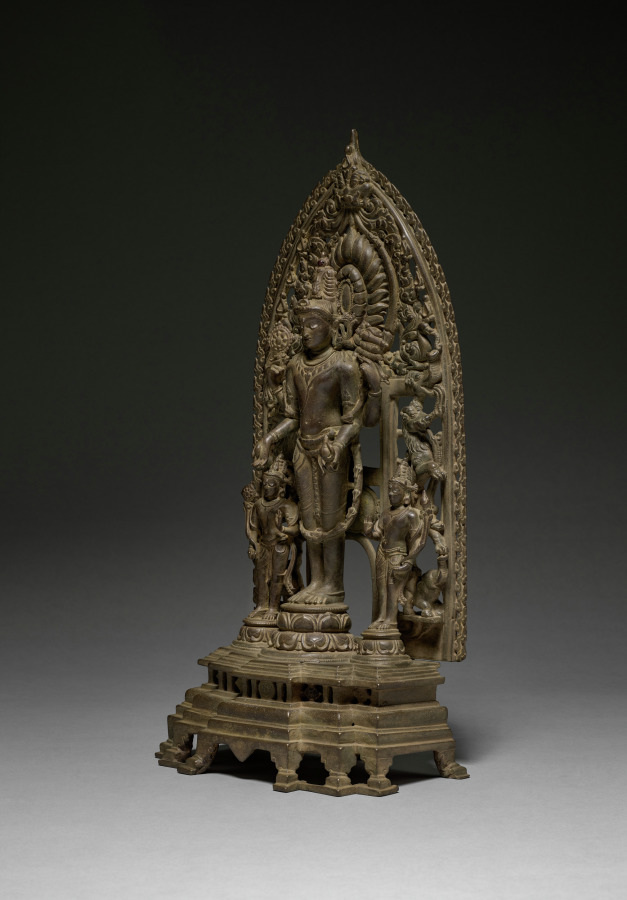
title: Vishnu Attended by Chakrapurusa and Shankhapurusa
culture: East India, Bengal, Pala period, 11th-12th century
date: 1000s–1100s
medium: bronze with silver inlay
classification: Sculpture